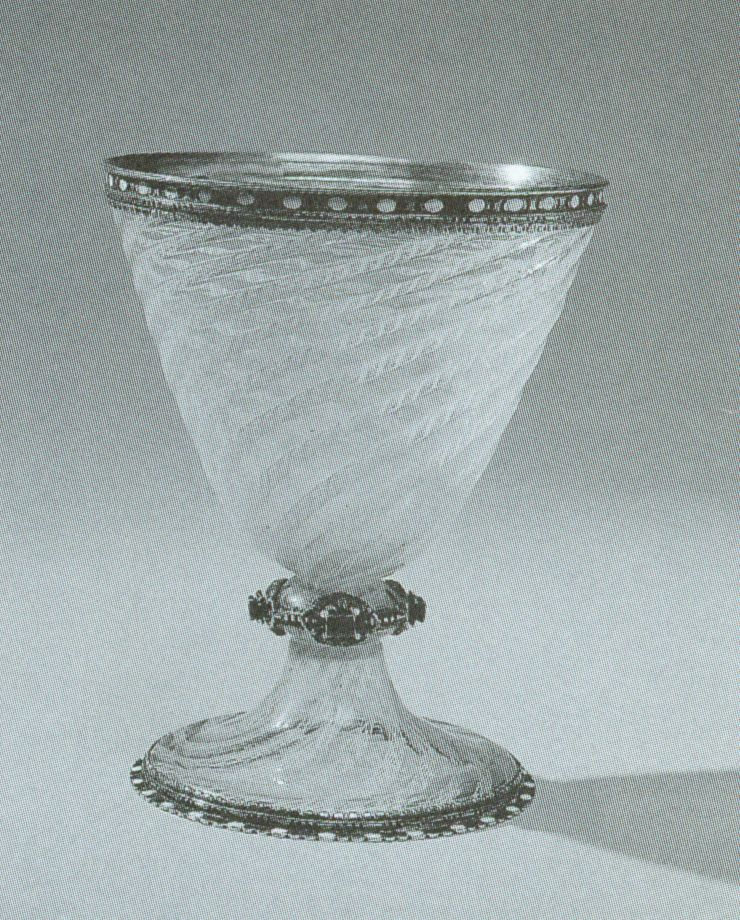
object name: Glass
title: Glass Goblet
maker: Possibly Venice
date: c. 1550-1600, mount: 18th/19th century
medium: Glass, silver gilt, and jewels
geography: Venice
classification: drinking vessel; european decorative arts; glass